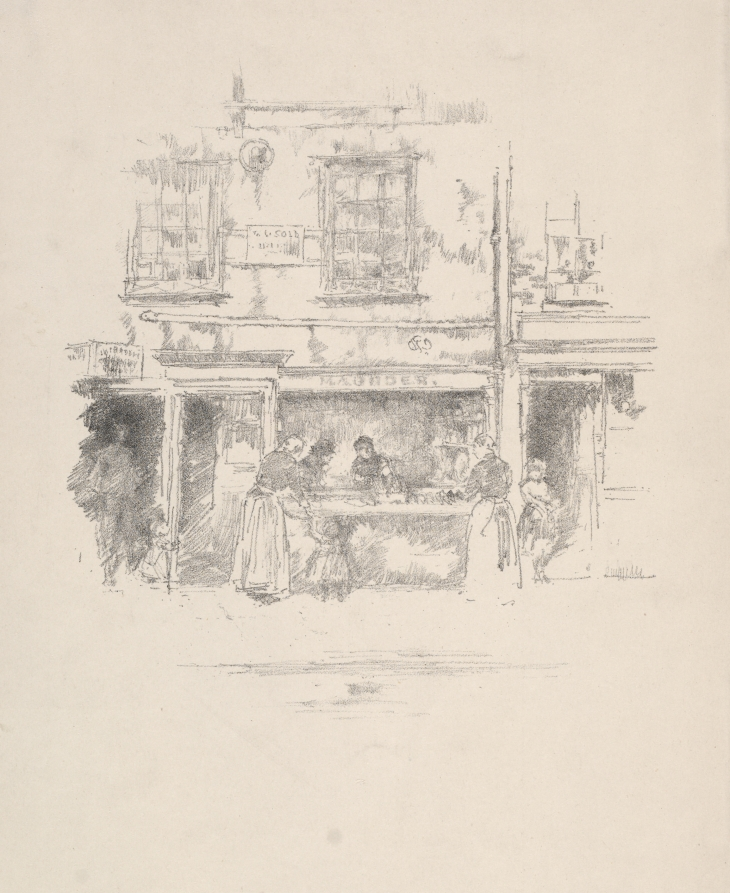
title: Maunder's Fish Shop, Chelsea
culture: America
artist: James McNeill Whistler (American, 1834–1903)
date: 1890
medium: lithograph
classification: Print